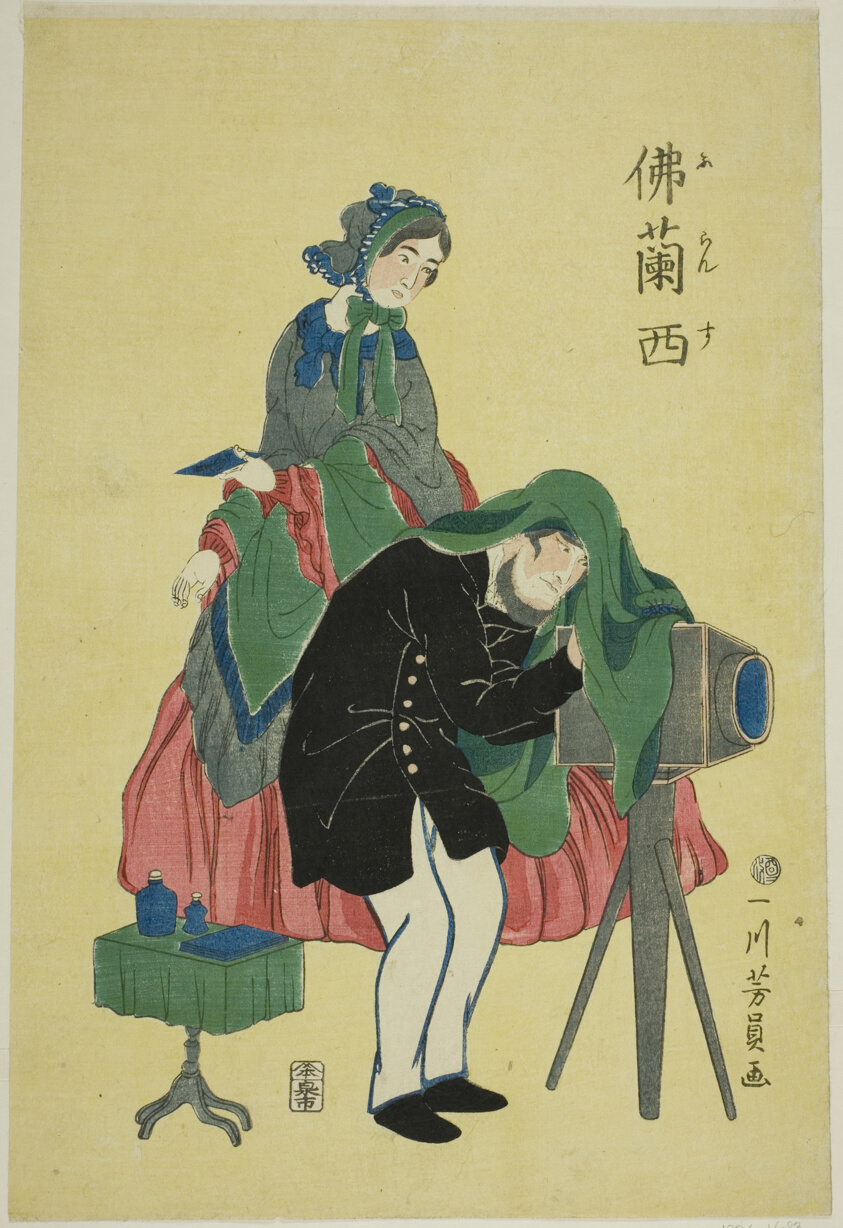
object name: Print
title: French photographer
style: Japanese (culture or style)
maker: Utagawa Yoshikazu (Japanese, active c. 1850–70)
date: 1861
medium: Color woodblock print; oban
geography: Japan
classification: print; asian art